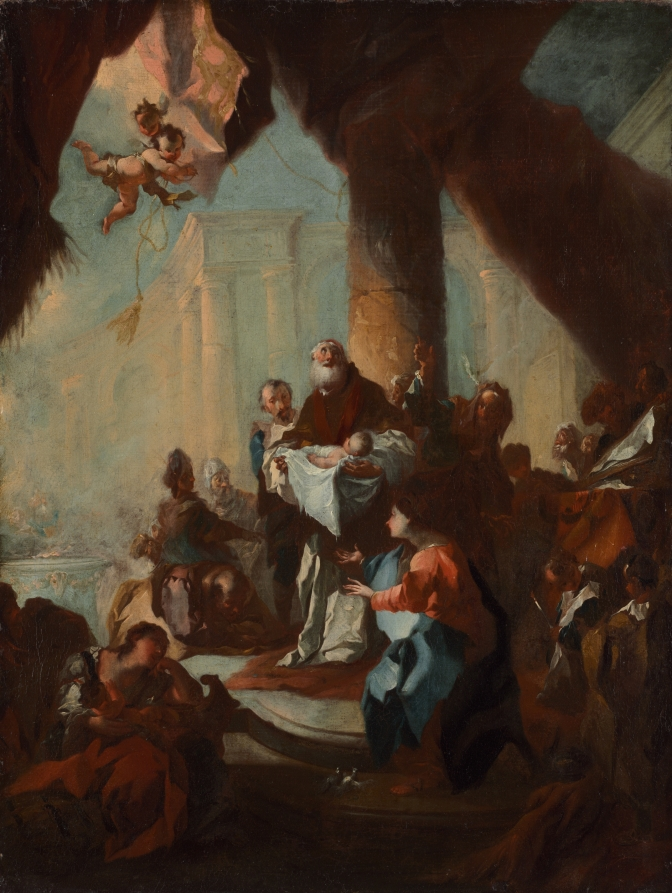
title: Study for "The Presentation of Christ in the Temple" (for Saint Ulrich, Vienna)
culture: Austria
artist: attributed to Franz Anton Maulbertsch (Austrian, 1724–1796)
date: c. 1750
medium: oil on canvas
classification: Painting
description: This loosely painted sketch is the preliminary design for an altarpiece in the Church of Saint Ulrich, Vienna. Mary and Joseph have brought the infant Jesus to the temple to be inducted into the Jewish faith; the aged priest Simeon cradles the infant in his arms, turning his gaze to heaven as he realizes that he is holding the Son of God. Strong contrasts of light and shadow underscore the drama of the moment. The frame is not original to this painting, but was made by an Austrian craftsman in the mid-1700s. Its florid style suits Maulbertsch’s flickering brushwork, and reflects the tradition of wood sculpture from Central Europe seen in other objects in the CMA's collection.